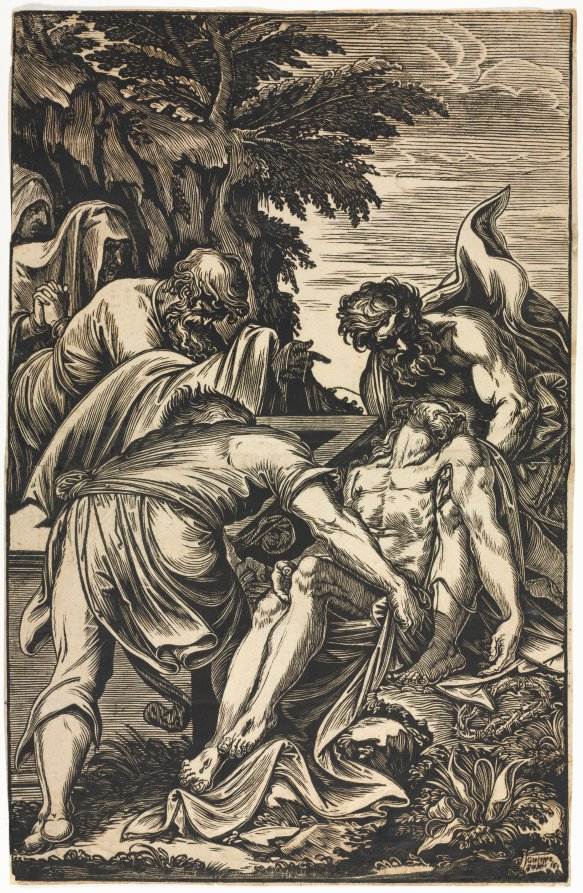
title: Entombment of Christ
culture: Italy, late 16th-early 17th century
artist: Giuseppe Scolari (Italian)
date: late 1500s-early 1600s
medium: woodcut on two sheets of joined paper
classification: Print